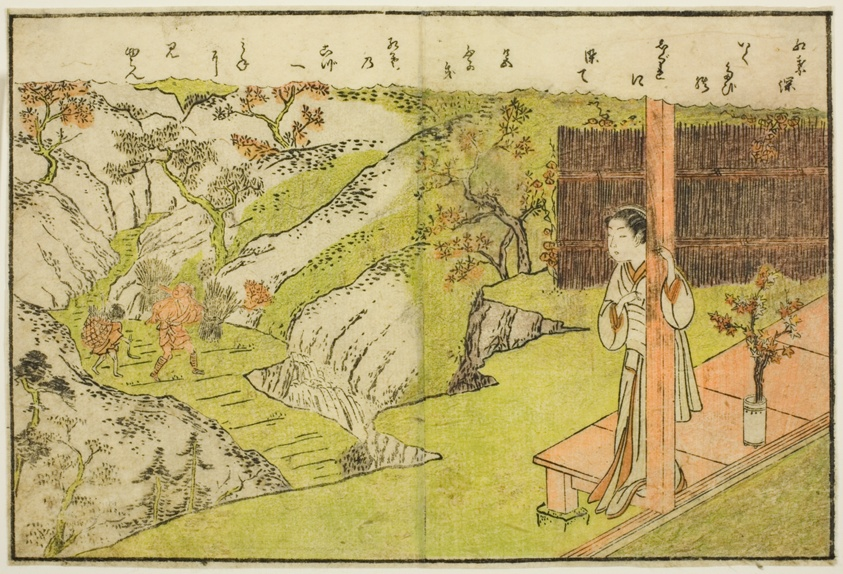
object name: Print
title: Double-page Illustration from Vol. 1 of "Picture Book of Spring Brocades (Ehon haru no nishiki)"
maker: Suzuki Harunobu 鈴木 春信; Japanese, 1725 (?)-1770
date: 1771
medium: Color woodblock print; double-page illustration from book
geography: Japan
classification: woodblock print; print; asian art